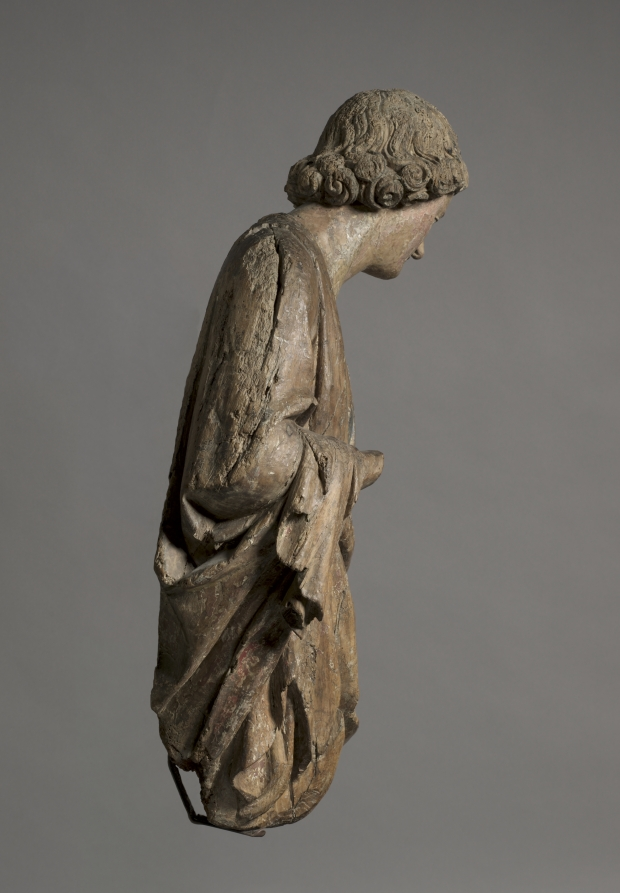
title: Angel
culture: France, vicinity of Reims, 13th century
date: c. 1250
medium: walnut with traces of gilding and polychromy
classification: Sculpture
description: Surviving in fragmentary condition, this pair of angels lacks lower arms, hands, wings, and attributes. Their original paint and gilding, now almost entirely lost, once rendered their garments a rich brocade and their hair a luxuriant gold. Nonetheless, in their graceful poses and sublime faces—which may portray tragic interest, anguish, or deep concern—their original delicacy and power are still evident. They embody the monumental style of 13th-century High Gothic cathedral sculpture in France. Their style specifically suggests they were carved in or around Reims, possibly by sculptors associated with the cathedral there. Their original placement is unknown, but they may have flanked an altar on columns.